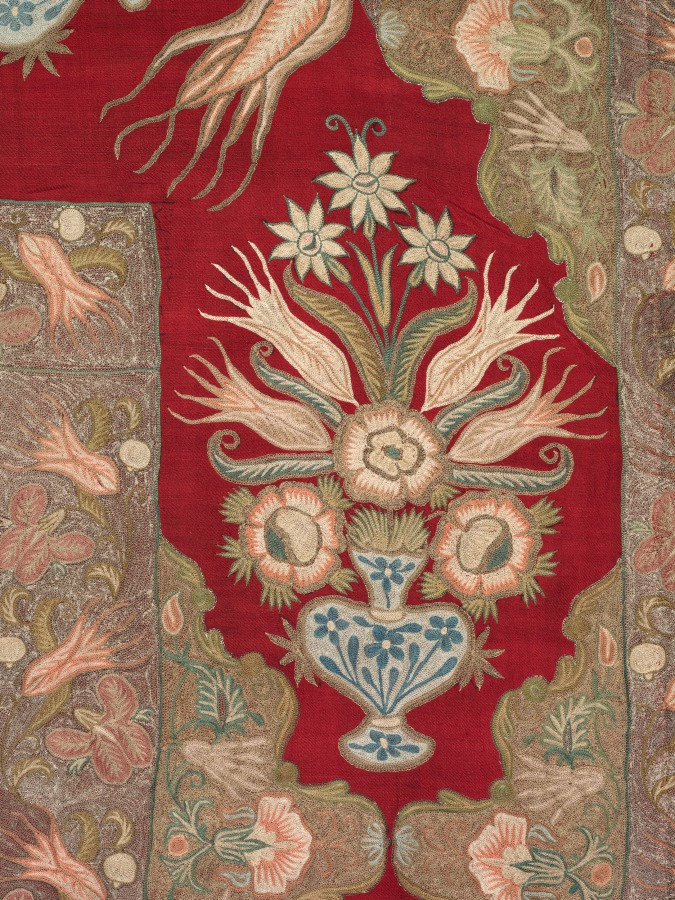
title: Embroidered Armenian liturgical curtain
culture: Turkey, Constantinople/Istanbul, Ottoman period (1299–1922)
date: 1763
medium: twill weave: wool; embroidery, chain stitch: silk, gilt- and silver-metal thread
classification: Textile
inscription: Inscription embroidered in erkatagir script with metal thread reads: "This curtain (varakouyr) is in memory of the people of Hassan Pasha Khan who gave it to the Monastery (vank) of Saint John the Baptist (Surp Garabed) on the Armenian date 10 May 1212 (1763 AD)."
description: This rare Ottoman embroidery features a floral bouquet that enriches the field under an elegant arch of gilt-metal thread. Flanked by vines of tulips and irises on a silver-metal-thread ground, vases of tulips and jonquils within cartouches adorn the main border and the well-turned corners, a sign of high quality. Dated 1763, the textile documents a mid-18th-century style and technique uncommon in Ottoman embroideries. The Armenian community commissioned this pattern for a liturgical curtain. Beneath the arch, Saint John the Baptist appears with a staff of victory, holding his own severed head in one arm and the Lamb of God in the other. The embroidered Armenian inscription reads: "This curtain is in memory of the people of Hassan Pasha Khan who gave it to the Monastery of Saint John the Baptist on the Armenian date 10 May 1212 [1763]."